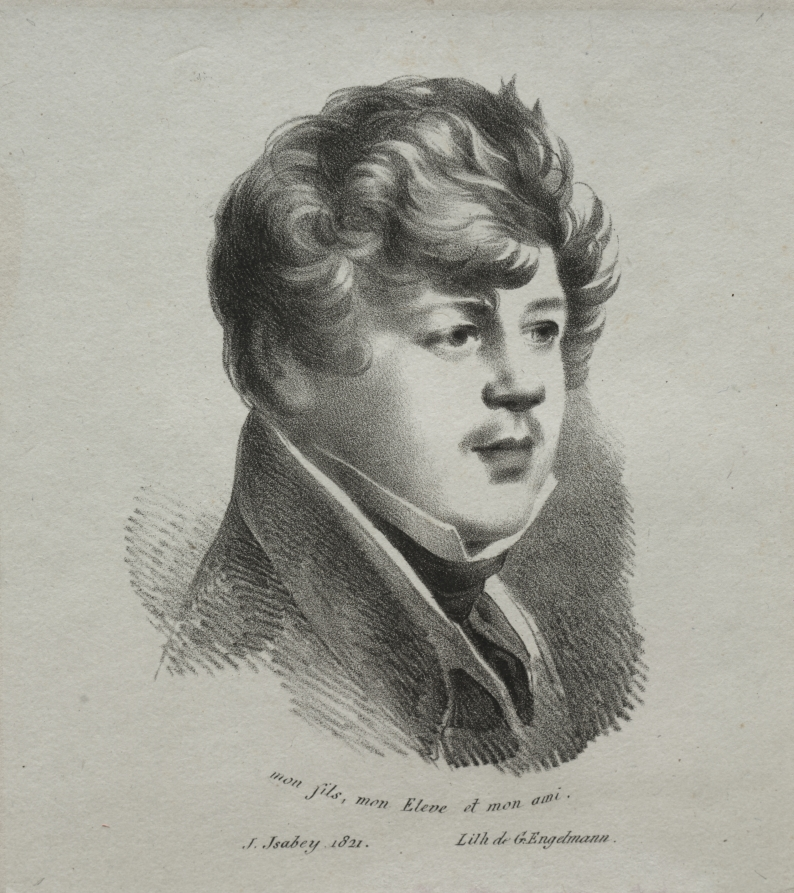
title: Eugène Isabey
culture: France, 19th century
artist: Jean-Baptiste Isabey (French, 1767–1855)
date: 1821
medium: lithograph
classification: Print